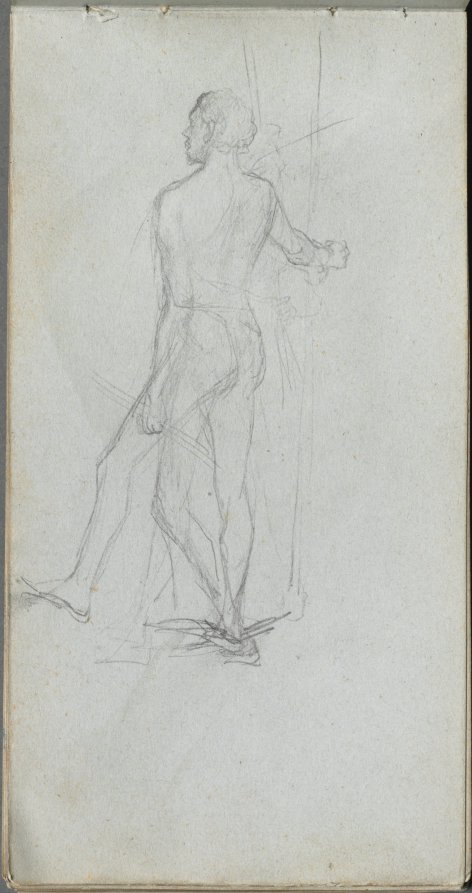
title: Sketchbook, page 60: Nude Male Study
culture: France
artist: Ernest Meissonier (French, 1815–1891)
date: c. 1860s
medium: graphite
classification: Bound Volume